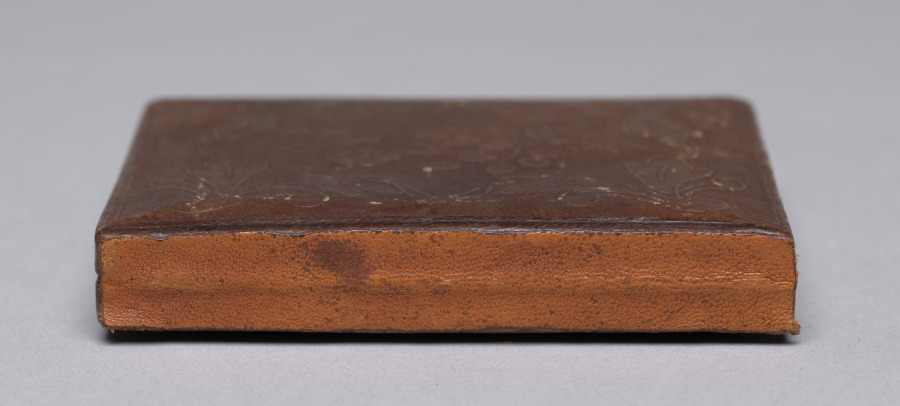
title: Architect with his drawings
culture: America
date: c. 1850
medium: daguerreotype, sixth plate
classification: Photograph